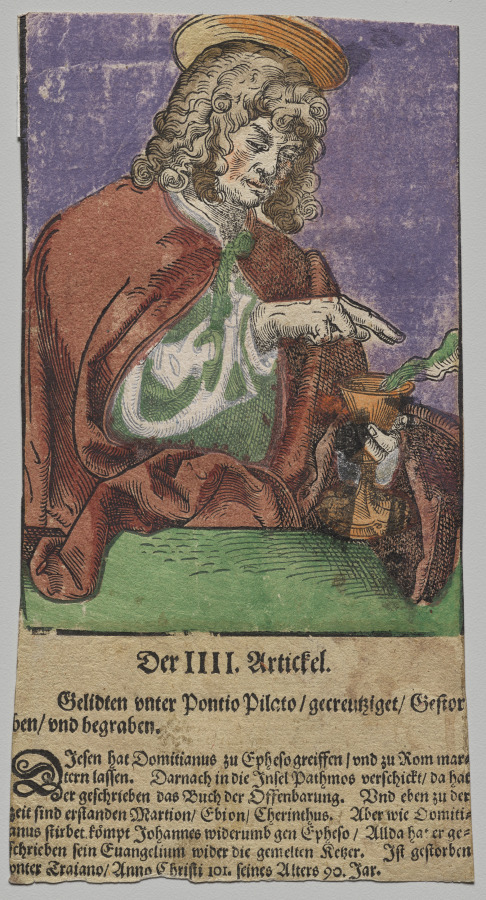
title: John from Christ, the Apostles, and Saint Paul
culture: Germany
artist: Lucas Cranach the Elder, After (German, 1472–1553)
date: 1563/64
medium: Woodcut with letterpress text, hand colored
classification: Print